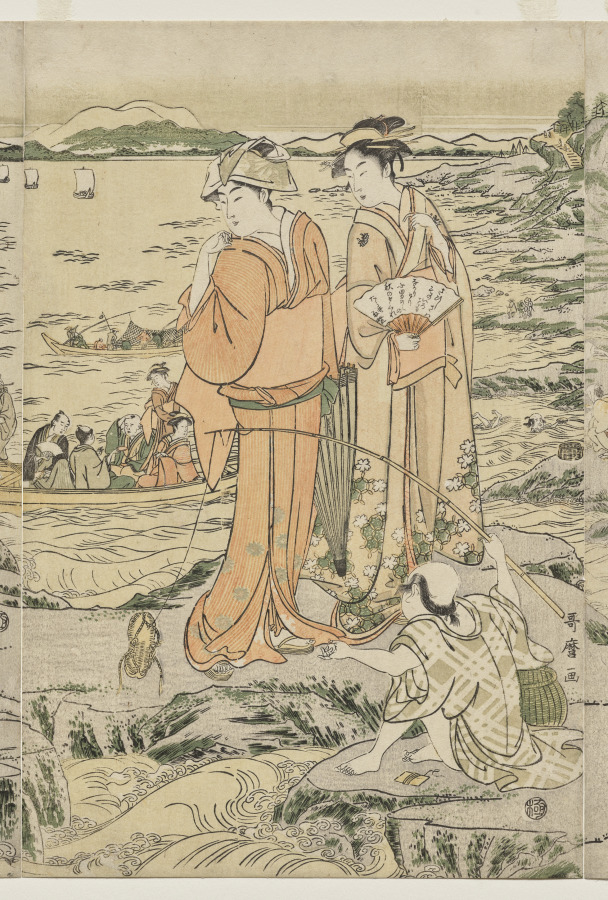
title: Fishing at Iwaya on Enoshima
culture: Japan, Edo period (1615–1868)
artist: Kitagawa Utamaro (Japanese, c. 1754–1806)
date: c. 1790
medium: color woodblock print from a triptych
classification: Print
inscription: Signature: Utamaro ga Censorship Seal: kiwame